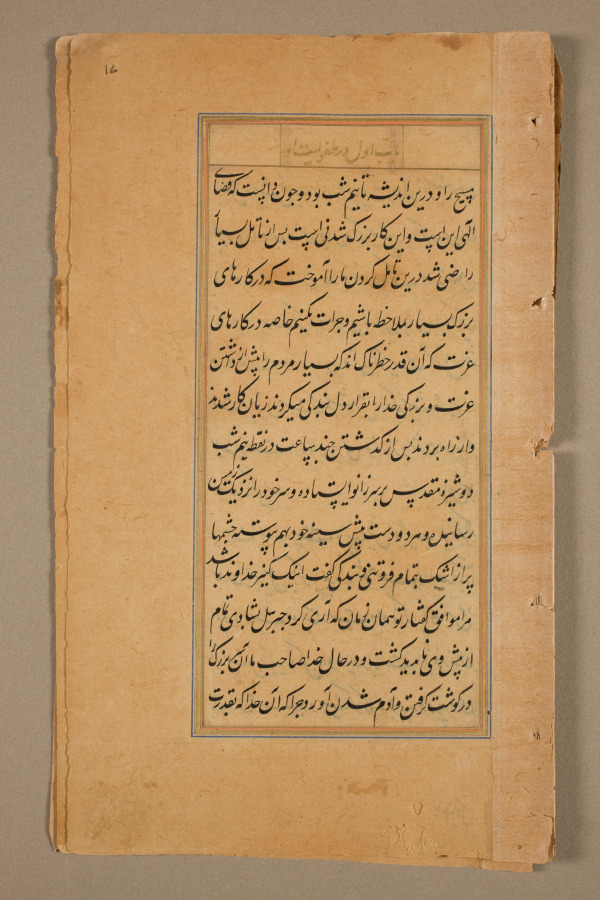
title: Text, folio 17 (recto), from a Mirror of Holiness (Mir’at al-quds) of Father Jerome Xavier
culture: Mughal India, Allahabad, made for Prince Salim (1569–1627)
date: 1602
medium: Ink and gold on paper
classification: Manuscript